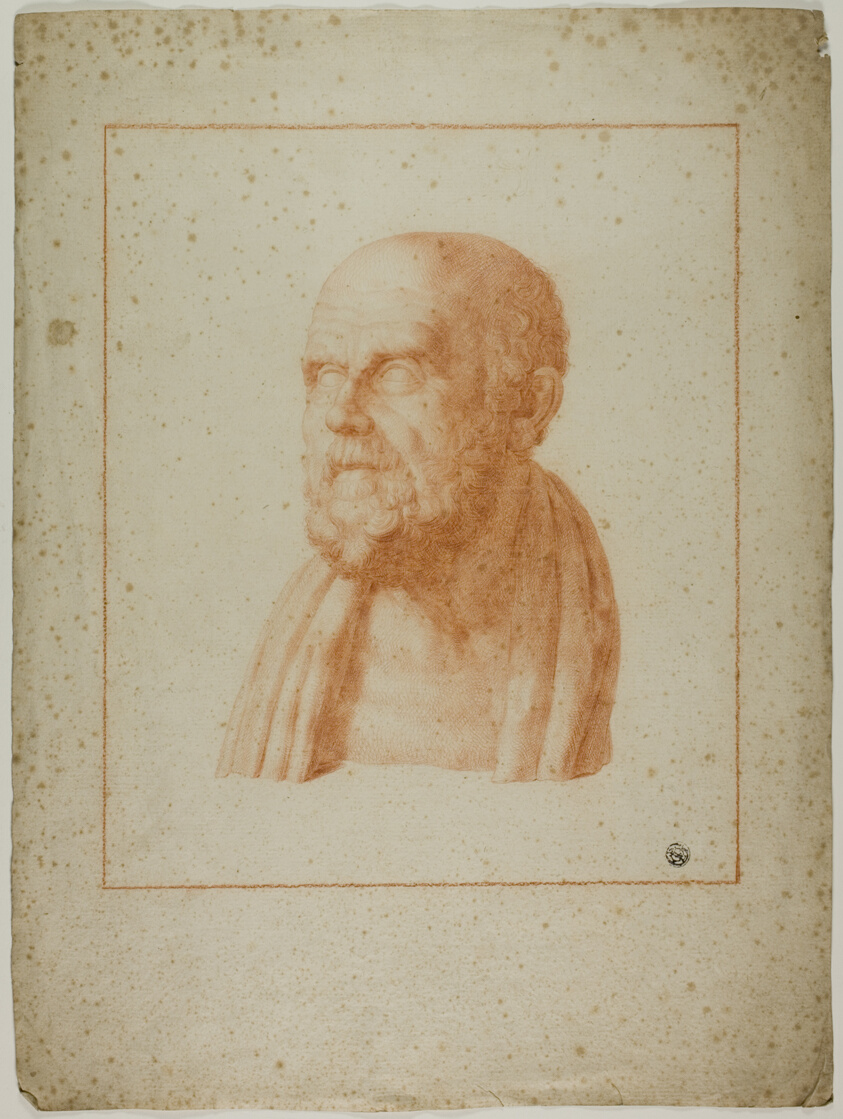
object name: Drawing and Watercolor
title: Ancient Bust of Bearded Man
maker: Unknown Artist; European, 18th century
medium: Red chalk, on ivory laid paper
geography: Europe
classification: chalk; drawings (visual works); prints and drawing